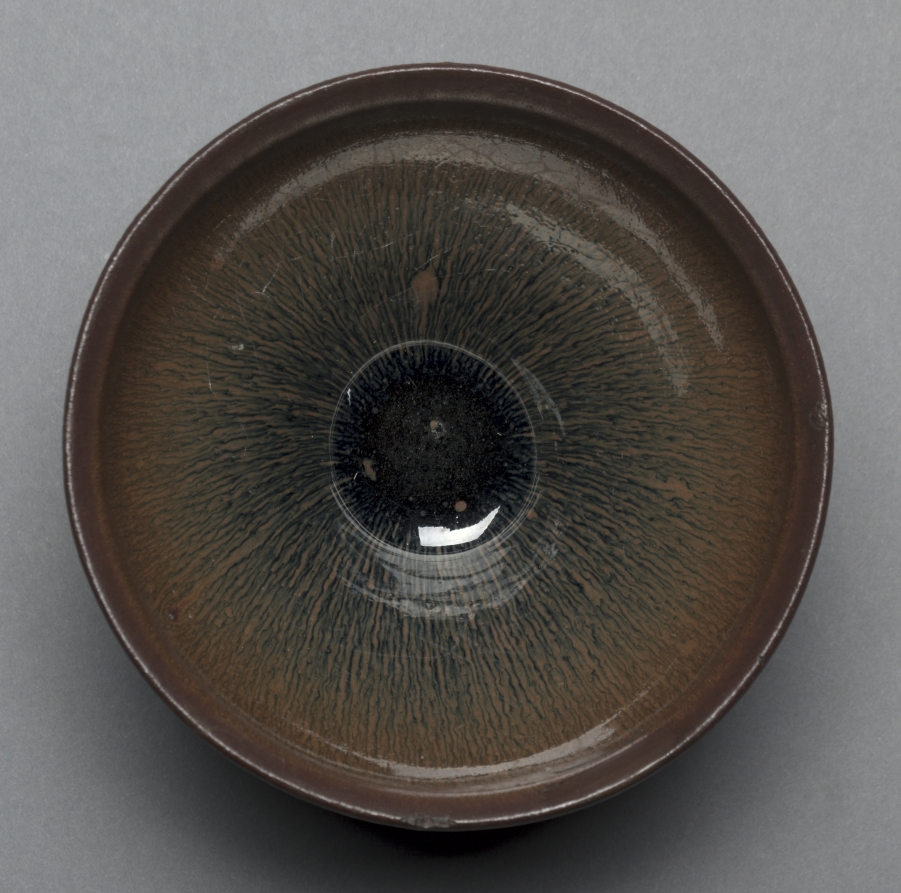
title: Tea Bowl: Jian Ware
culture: China, near Shui ch'i, Song dynasty (960-1279)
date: 960–1279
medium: stoneware with "hare's fur" glaze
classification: Ceramic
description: Jian ware was very popular with the tea cultures in China and Japan.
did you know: "Hare’s fur” glaze is named for the streaks resembling delicate hairs.